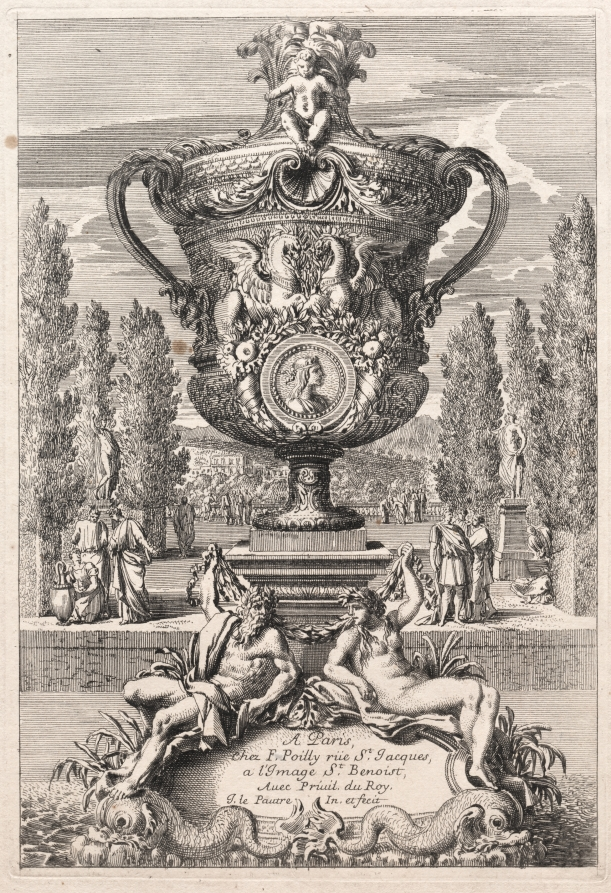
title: Decorative Urn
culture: France, 17th century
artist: Jean Le Pautre (French, 1618–1682)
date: 1600s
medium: etching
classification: Print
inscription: inscribed, within image, in plate: A Paris, / Chez F. Poilly rue St. Jacques, / a l'Image St. Benoist, / Avec Privil. du Roy, / J. le Pautre in. et fecit